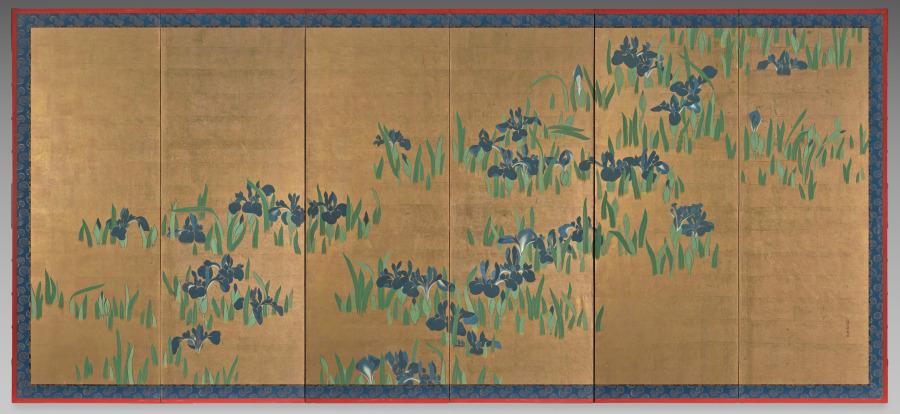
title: Irises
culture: Japan, Edo period (1615–1868)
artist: Watanabe Shikō (Japanese, 1683–1755)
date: 1700s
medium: One of a pair of six-panel folding screens, ink and color on gilded paper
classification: Painting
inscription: signed and sealed lower left of the first panel from the left.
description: The subject of this painting comes from a 10th-century text. It tells of a young nobleman’s journey into the lonely countryside, far from the capital city of Heian-kyō (Kyoto). There he came upon a small stream, the banks of which were covered with blooming irises, on which the artist has chosen to focus our attention. While viewing the beautiful flowers the nobleman composed a poem: I have a beloved wife, Familiar as the skirt of a well-worn robe, And so this distant journeying Fills my heart with grief.